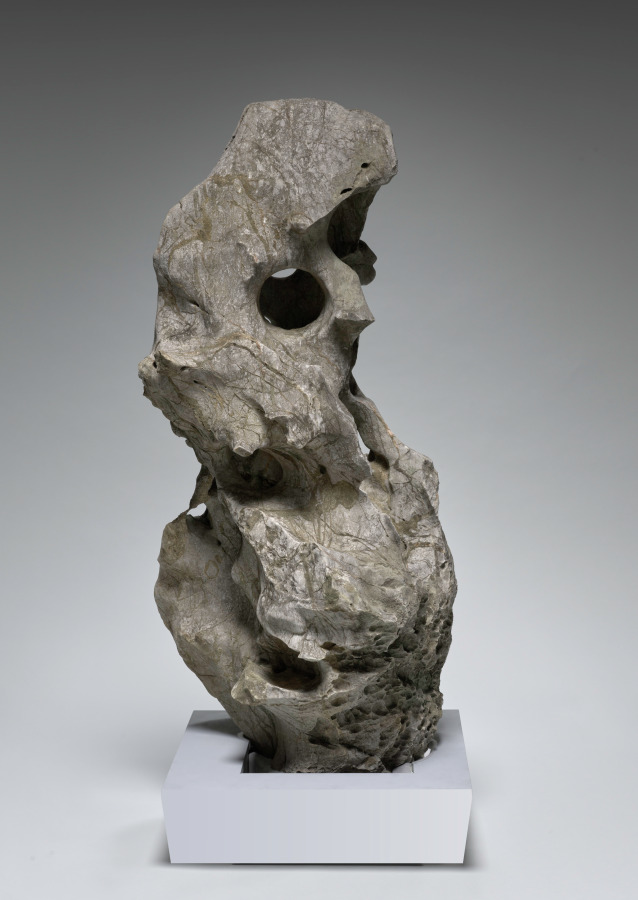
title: Taihu Garden Stone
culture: China, Jiangsu province, Wuxi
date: 0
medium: Limestone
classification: Stone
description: In China, rocks are considered elements of nature that possess spirit and life energy. With its upward winding masses, perforations, weathered surface, and multiple viewpoints, the stone exhibits sculptural qualities and embodies constant transformation through natural forces and human intervention. A solid piece of rock, it was originally sourced from the Lake Tai region. Stones were collected, set up in gardens, or installed on scholar’s desks as miniature mountains. Traditionally, Taihu stones were the most desirable type of rock. This stone is a gift by the contemporary artist Liu Dan, known for his depictions of rocks, who calls them "the stem cells of Chinese landscape."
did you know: The donor, Liu Dan, is the most prominent and celebrated painter of rocks in contemporary China.